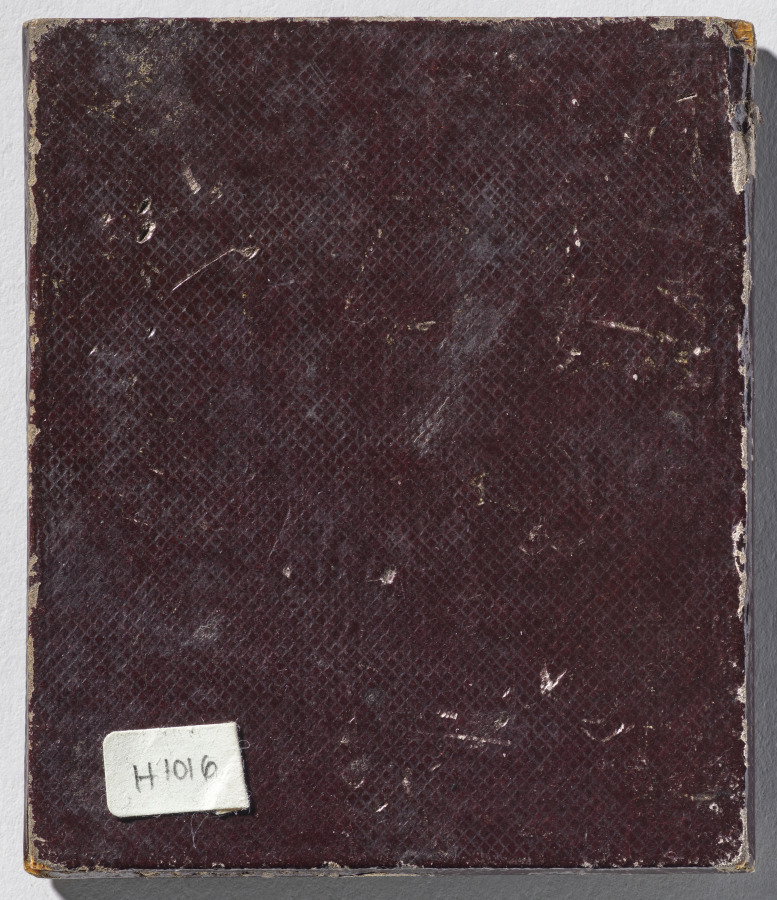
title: Mother and Child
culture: America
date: c. 1865–70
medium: ambrotype, tinted, sixth plate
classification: Photograph